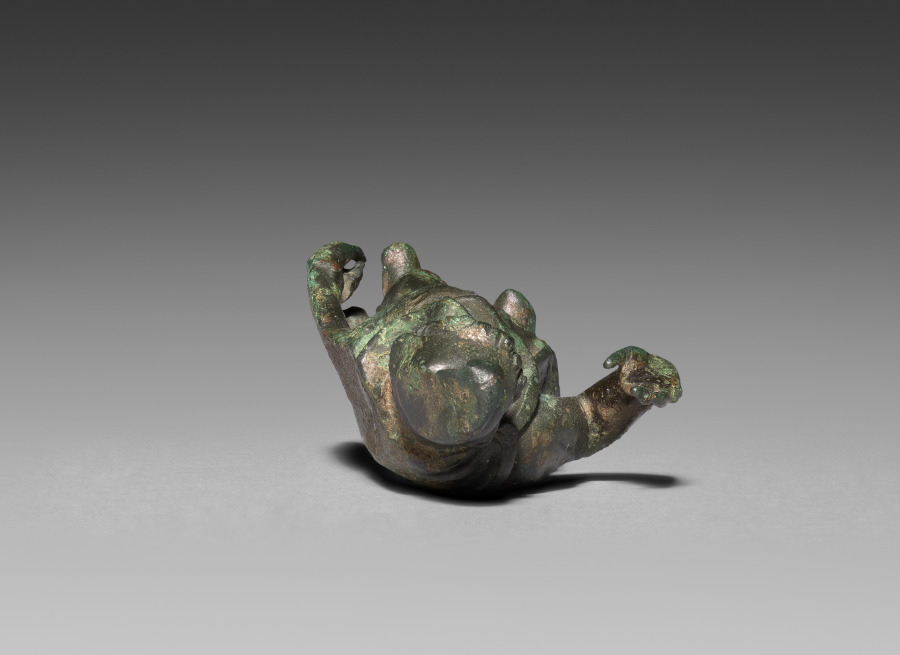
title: Barbarian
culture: Italy, Rome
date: 1–100 CE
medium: bronze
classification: Sculpture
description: This bearded figure wears a tunic, trousers, and a soft conical hat with the apex bent over, called a Phrygian cap. He stands with his right hand raised (missing the index and little finger) and his left leg slightly bent. The figure originally held an implement in his lowered left hand, whose fingers curve around a shaft. The garments and cap identify him as a foreigner, likely a Dacian. Emperor Trajan (reigned AD 98–117) fought two military campaigns against Dacia (modern-day Romania), where he conquered and annexed the southern half of the region.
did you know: This figure may have decorated an ornate parade breastplate on a horse.